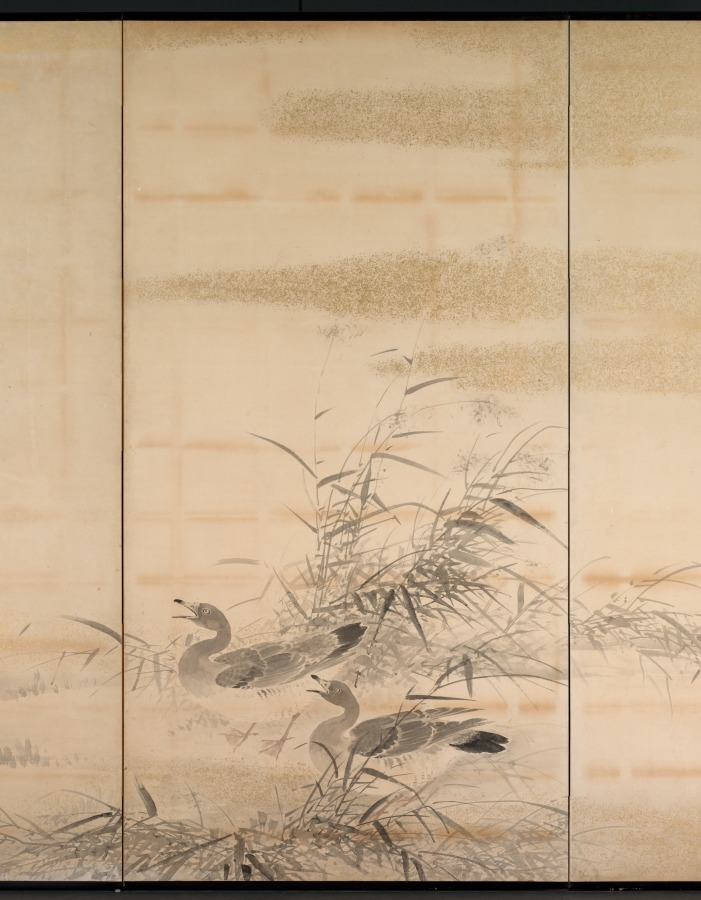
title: Geese, Reeds, and Water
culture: Japan, Edo period (1615–1868)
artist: Yamamoto Baiitsu (Japanese, 1783–1856)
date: 1800s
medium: One of a pair of four-panel folding screens; ink, color, and cut gold foil on paper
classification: Painting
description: This byōbu composition differs from most in that it comprises two four-panel screens, rather than two six-panel units. Since the current mounting is modern, it is impossible to determine whether its present configuration represents its original design. Some panels may have been removed to help the screens better fit into a modern interior space. Baiitsu worked almost exclusively in monochromatic ink tones and favored classical Chinese painting themes.